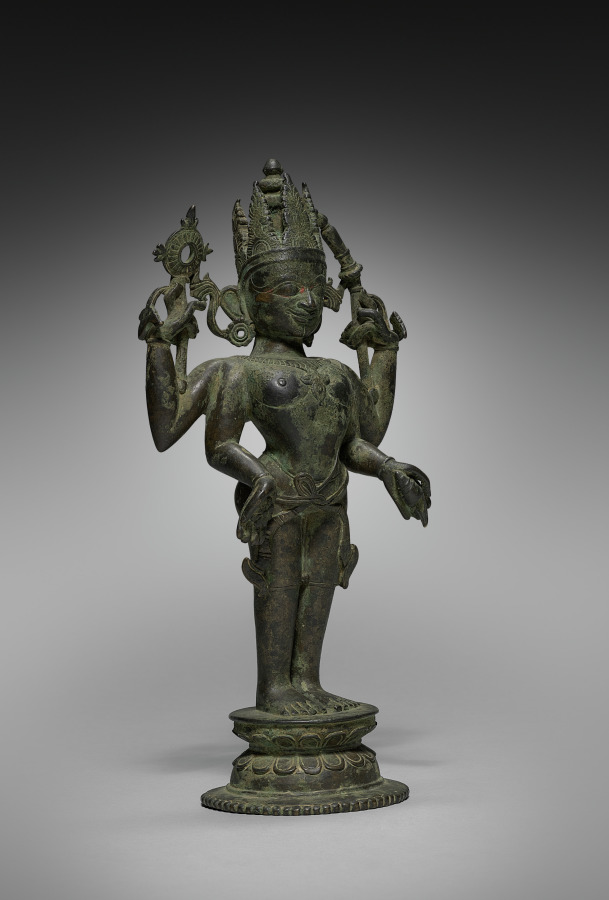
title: Vasudeva - Vishnu - Narayana as Shridhara, one of the 24 forms of Vishnu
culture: West India, 16th-17th century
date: 1500s–1600s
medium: brass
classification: Sculpture